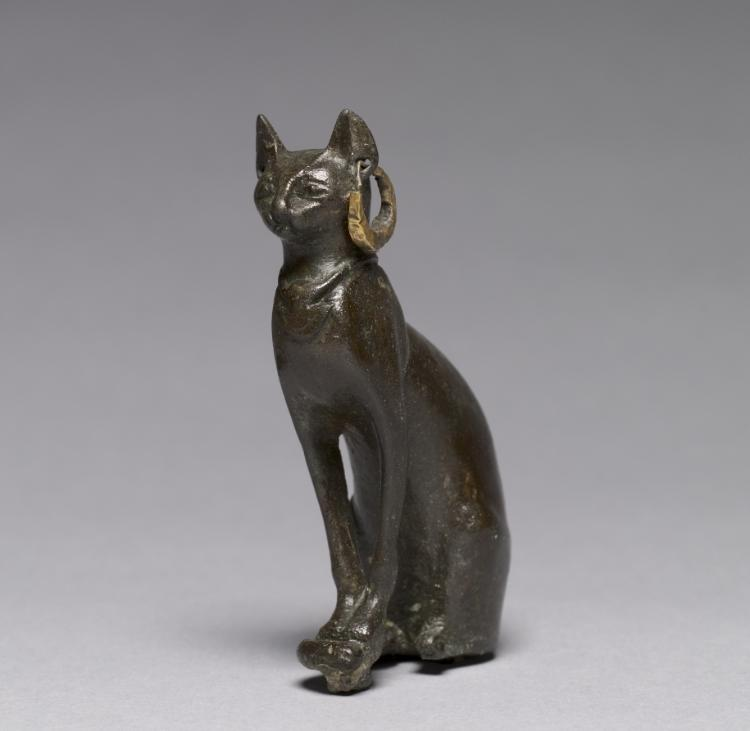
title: Cat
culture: Egypt, Late period (715–332 BCE), Dynasty 26 or later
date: 664–30 BCE OR 664–330 BCE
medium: bronze and gold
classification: Sculpture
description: Cats were the sacred animal of Bastet, Egyptian goddess of fire, cats, and protector of the home. Sitting upright in a pose characteristic of these feline figurines, this bronze cat adorned with an embossed pendant and gold earring was made as a votive offering to be deposited with the deceased.